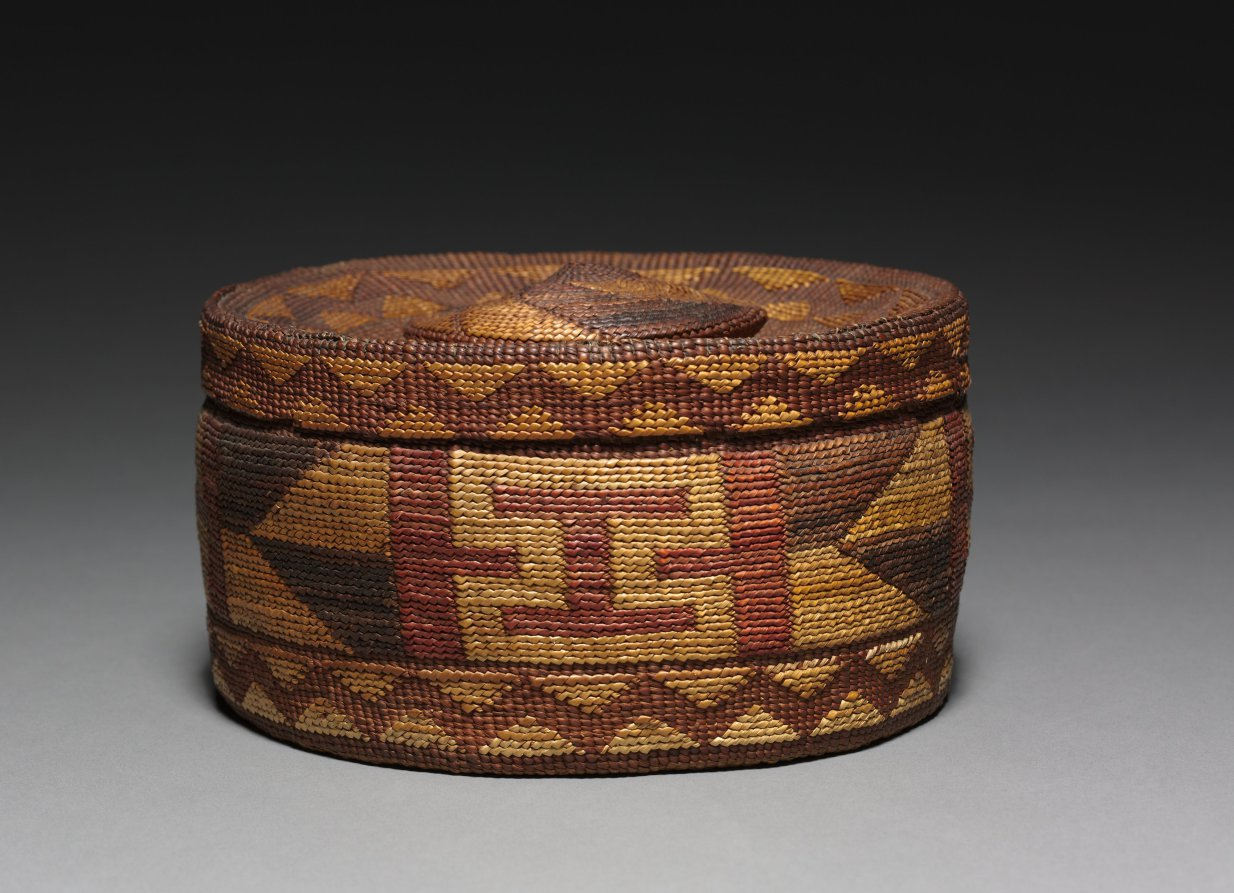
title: Basket with Rattle Top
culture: Northwest Coast, Tlingit, 20th century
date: before 1929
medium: twined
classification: Basketry